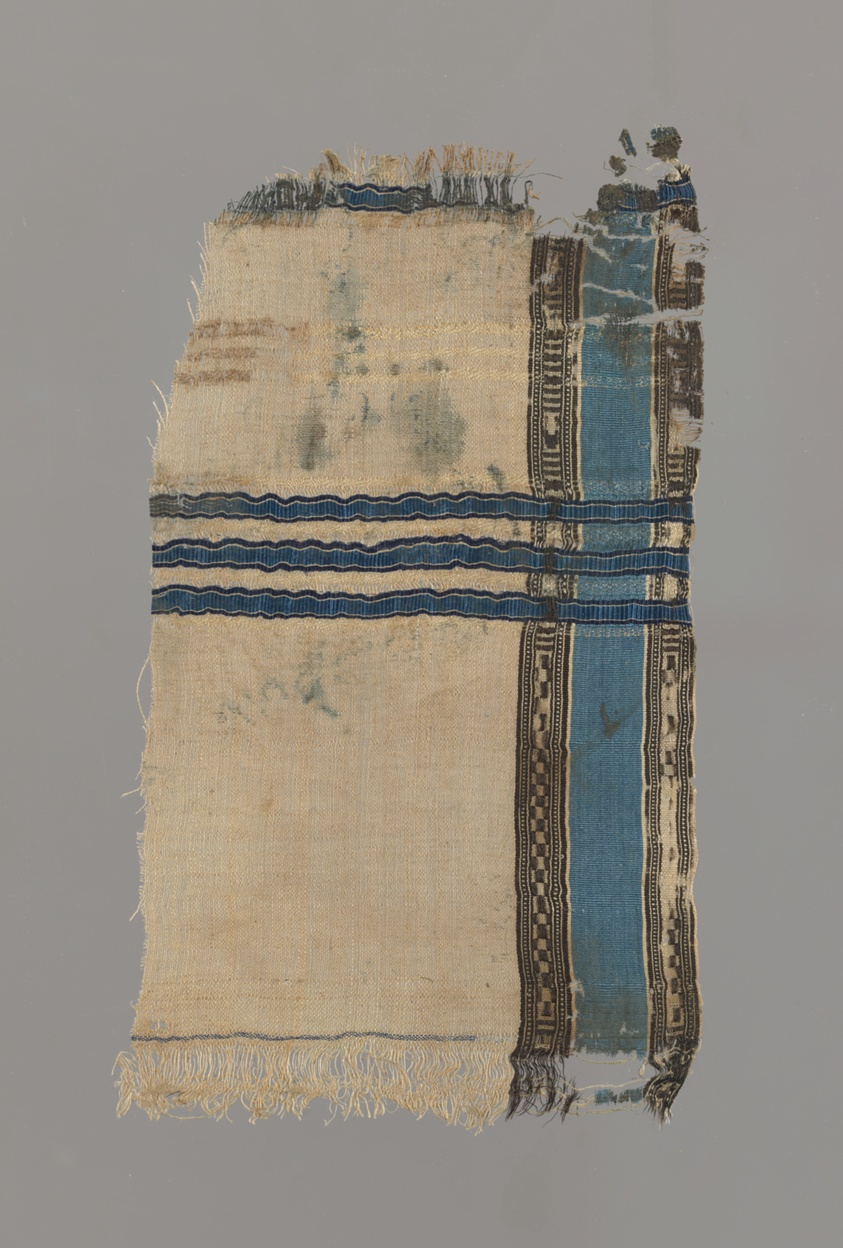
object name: Textile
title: Fragment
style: arabian, mamluk, ayyubid, fatimid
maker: Egypt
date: Arab period (641–969)/Fatimid period (969–1171)/Ayyubid period (1171–1250)/ Mamluk period (1250–1517), 9th/13th century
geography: Egypt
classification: textile; weaving